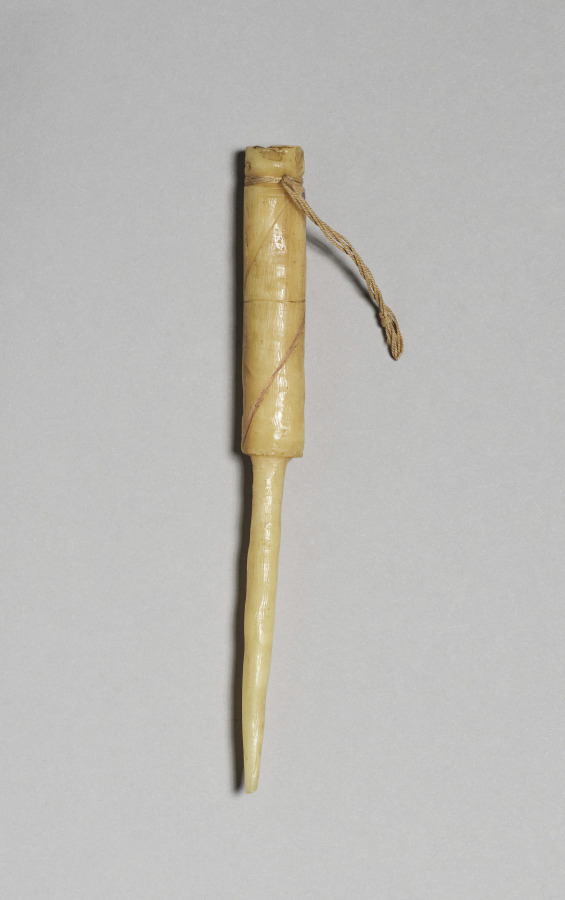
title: Bone Awl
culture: America, Native North American, Gaigwu (Kiowa), late 19th century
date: late 1800s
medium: bone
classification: Implements